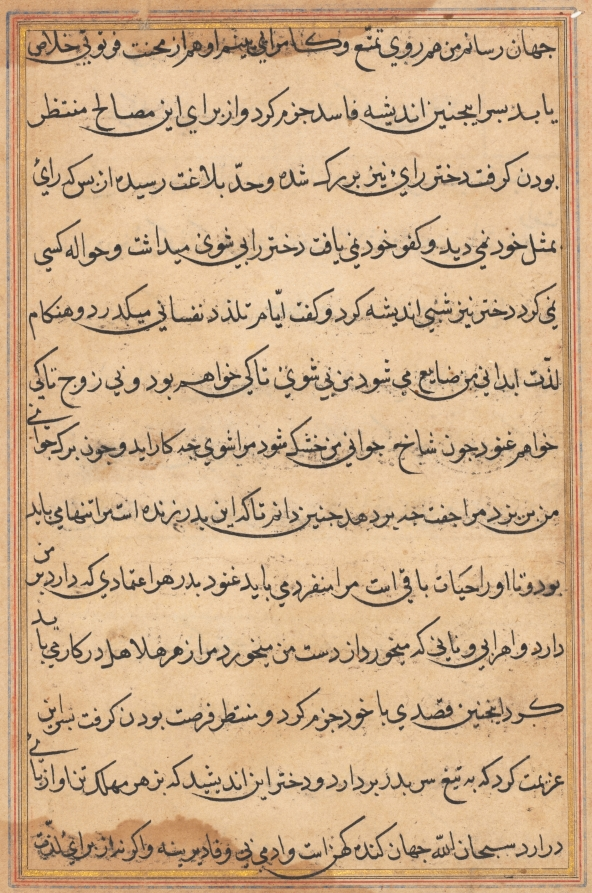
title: Page from Tales of a Parrot (Tuti-nama): text page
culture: Mughal India, court of Akbar (reigned 1556–1605)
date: c. 1560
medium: gum tempera, ink, and gold on paper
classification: Painting